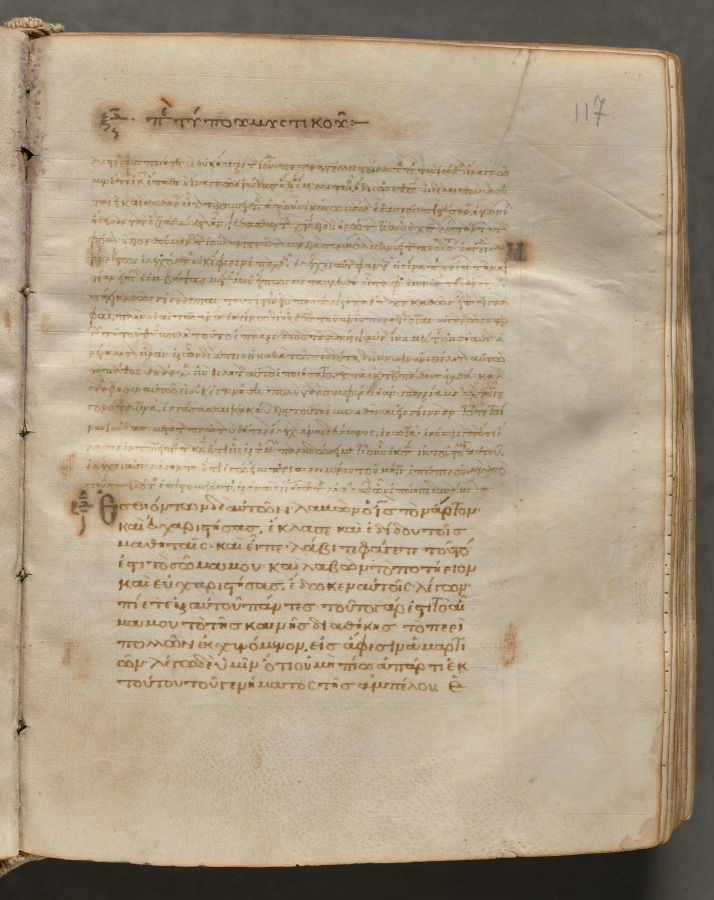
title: Text, folio 117 (recto), from a Gospel Book with Commentaries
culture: Byzantium, Constantinople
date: c. 1000–1100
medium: ink, tempera, and gold on vellum; leather binding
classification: Bound Volume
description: Each of the four gospels in this book opens on a page with brilliantly illuminated borders depicting the author of the text as well as birds-principally peacocks, symbols of the immortality of the soul-and fountains, representing the fountain of life and the salvation of the soul. This volume consists of 428 leaves with texts in Greek. Its level of sophistication suggests that it was probably written and decorated in a monastery in Constantinople.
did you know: Gospel Books were carried in procession through Byzantine churches.